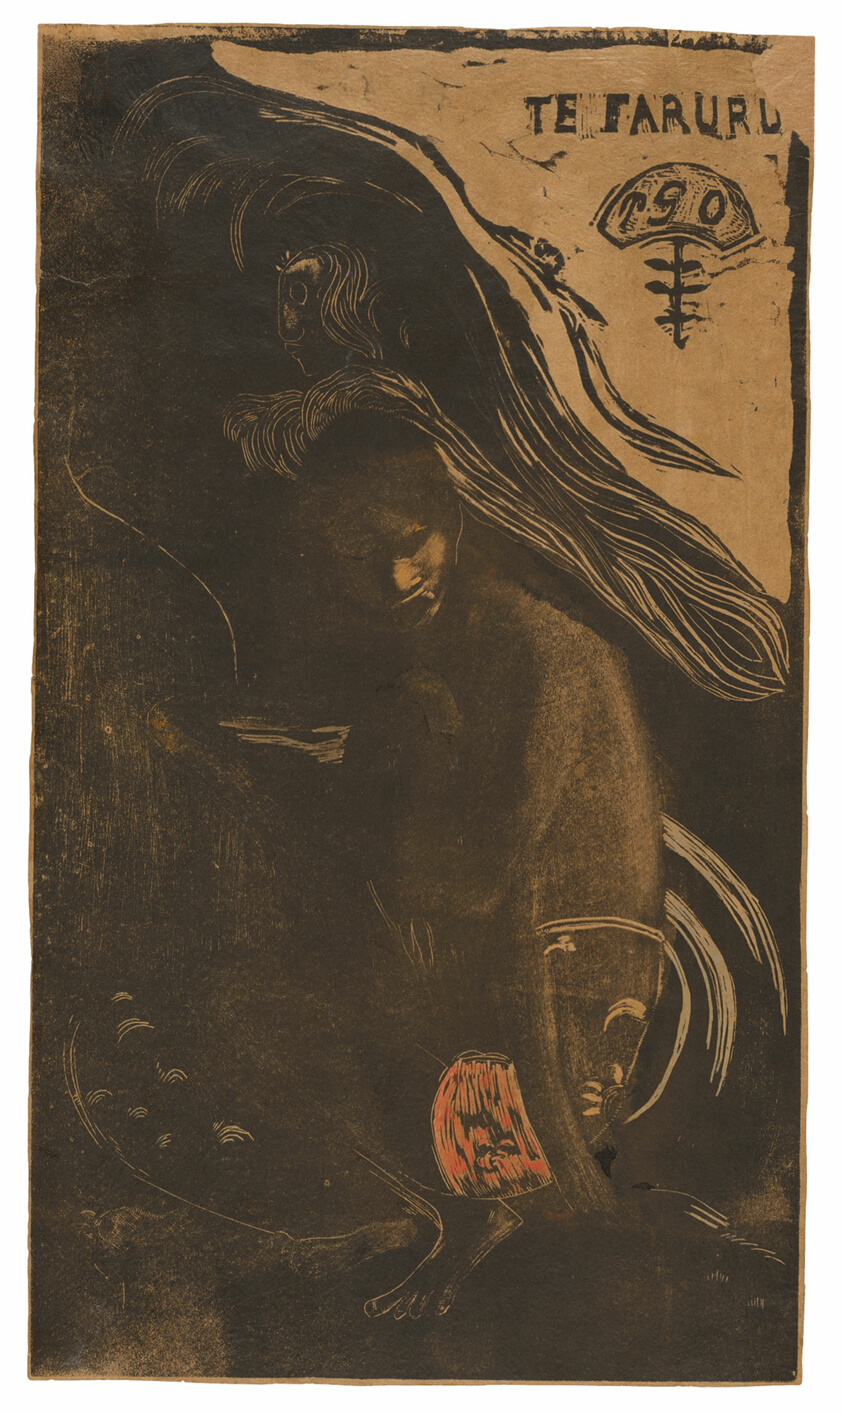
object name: Print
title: Te faruru (Here We Make Love), from the Noa Noa Suite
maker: Paul Gauguin (French, 1848-1903)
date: 1893/94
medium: Wood-block print, printed twice in brown and black inks, with selective wiping, and a transferred twill impression, touches of brush and red and green watercolors, and traces of brush and black ink, on pale-pink wove paper (faded to tan)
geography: France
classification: woodcut; print; prints and drawing